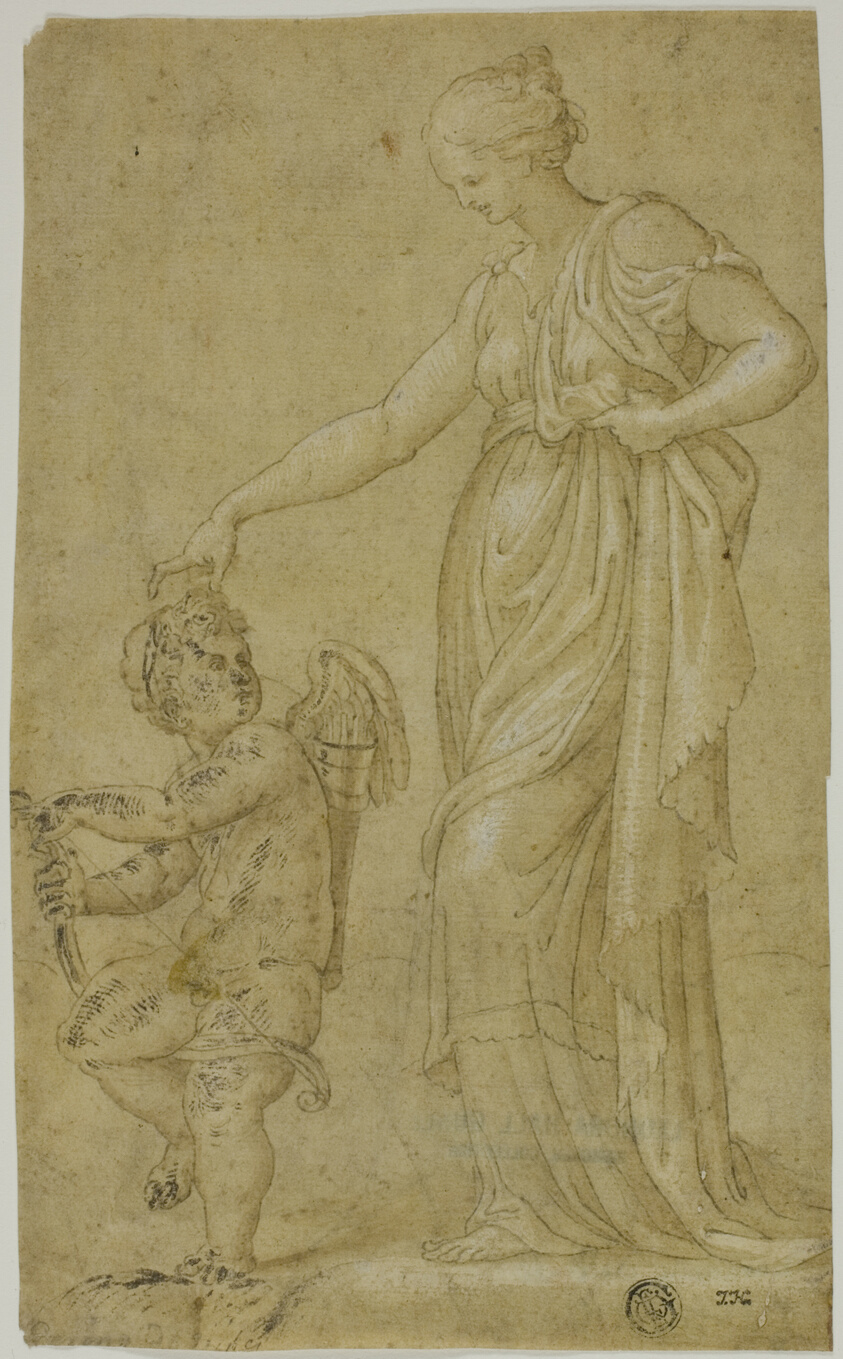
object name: Drawing and Watercolor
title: Venus (?) and Cupid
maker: Circle of Bernardino Campi (Italian, 1521-1591); or possiby Pierino da Vinci (Italian, c. 1530-1553)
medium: Pen and brown ink with brush and brown wash, heightened with lead white (partly oxidized), on cream laid paper prepared with tan wash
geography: Italy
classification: ink and wash; drawings (visual works); prints and drawing